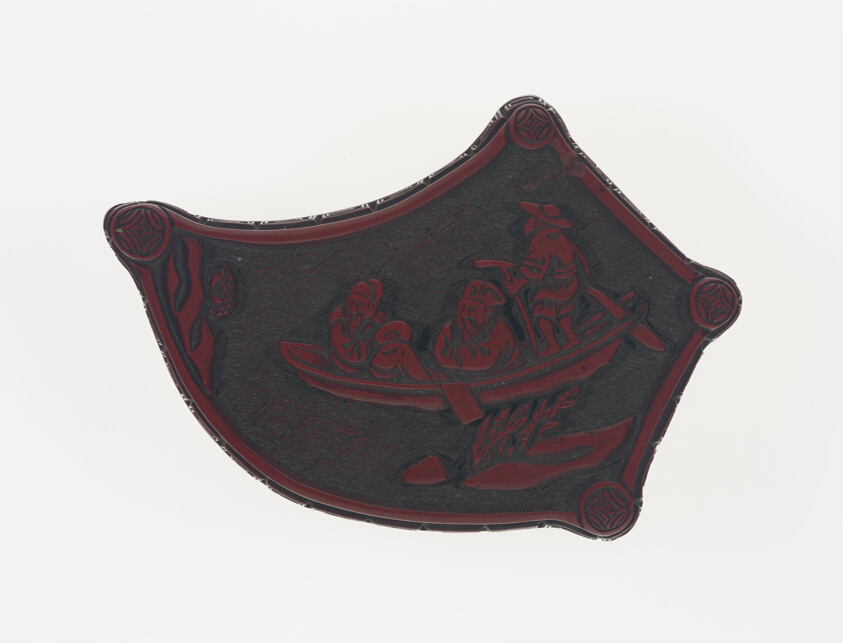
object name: Vessel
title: Box with Boating Scene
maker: China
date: Ming dynasty (1368–1644)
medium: carved red lacquer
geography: China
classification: lacquerware; asian art